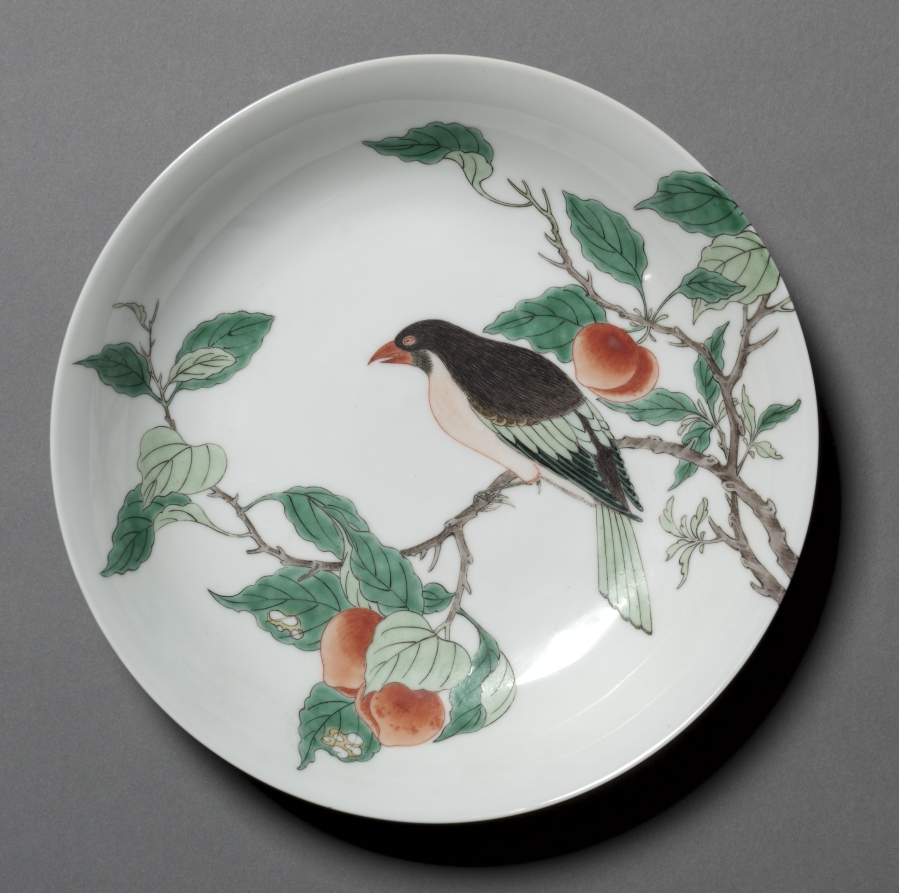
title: Dish with Bird on Fruit Tree Branch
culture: China, Jiangxi province, Jingdezhen kilns, Qing dynasty (1644–1911), Kangxi mark and reign (1662–1722)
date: 1662–1722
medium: Porcelain with famille-verte overglaze enamel decoration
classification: Ceramic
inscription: 大清康熙年制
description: Among the greatest achievements of early Qing porcelain are table wares and display objects decorated with polychrome painting like this pair of dishes. Featuring birds perched in peach trees, the dishes are related to the famous birthday set commissioned for the Kangxi emperor’s sixtieth birthday in 1713. These pieces are more inventive than those in the 1713 set, however, since the unframed ornament is allowed to continue unbroken from the outer to inner surfaces and back out again, thus transforming each vessel into a three-dimensional canvas.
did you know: By the early eighteenth century, the imperial kilns at Jingdezhen were producing exceptionally fine pieces on a staggering scale.